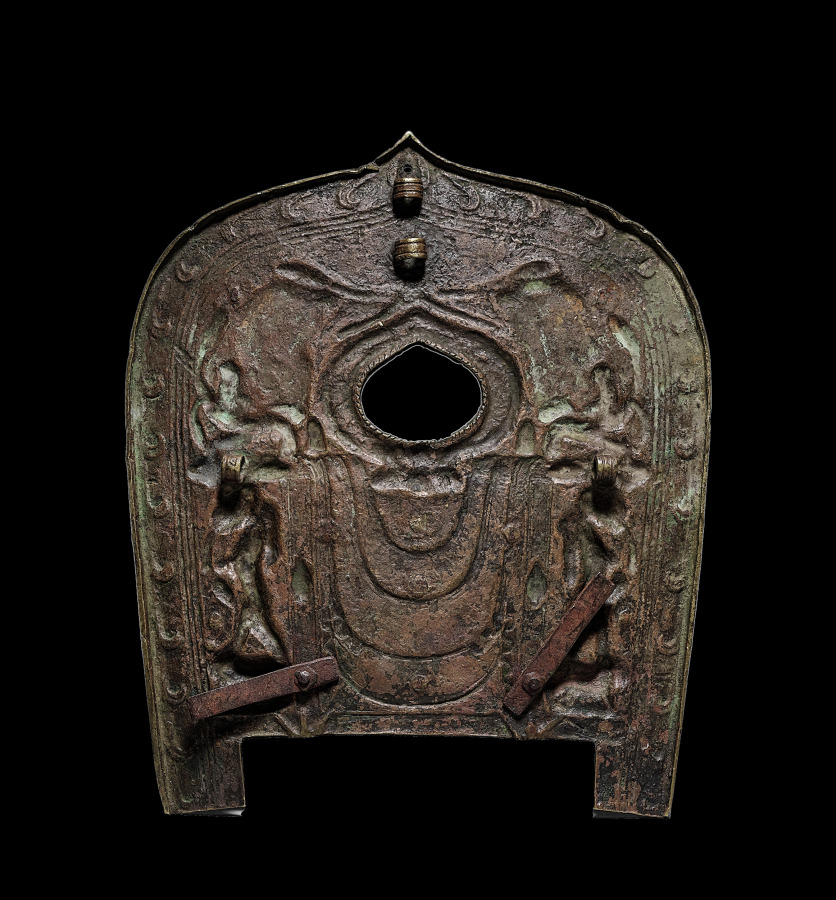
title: Halo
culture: Tibet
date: 1200s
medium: bronze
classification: Sculpture